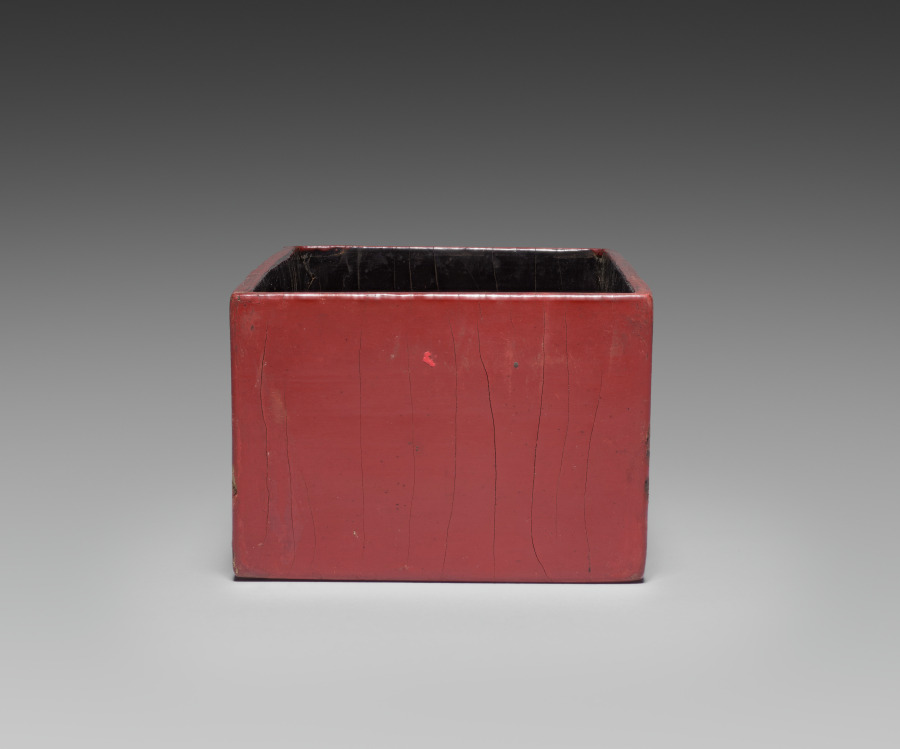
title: Drawer for a Tihong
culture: China, Ming dynasty (1368-1644), Wanli reign (1572-1620)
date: 1585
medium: carved cinnabar lacquer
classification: Lacquer